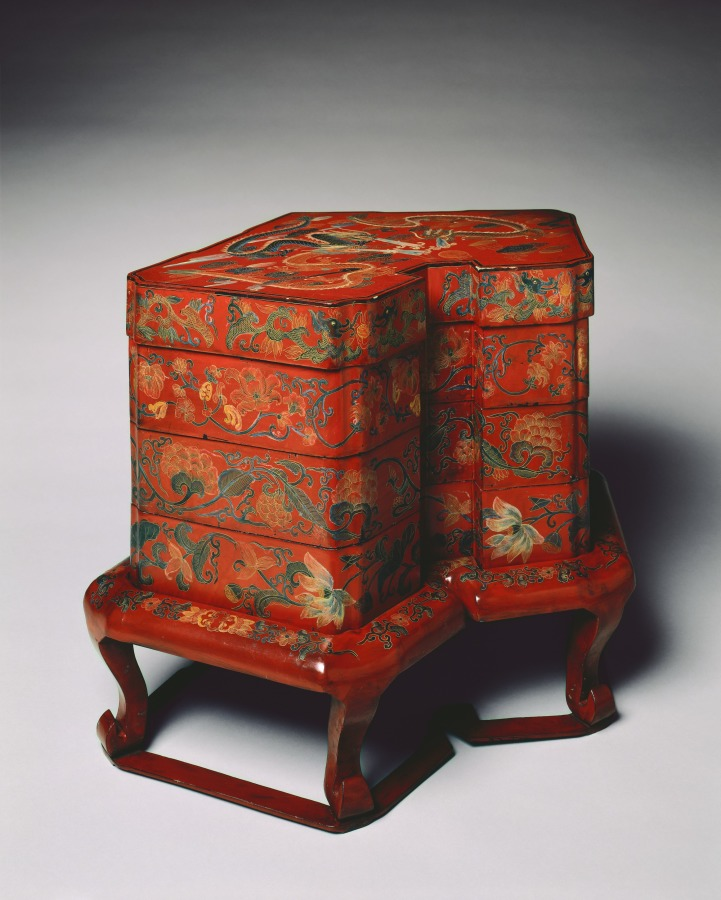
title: Tiered Food Box with Stand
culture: Japan, Edo period (1615–1868)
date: late 1700s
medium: red lacquer over a wood core, with litharge painting and engraved gold designs (Ryukyuan)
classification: Lacquer